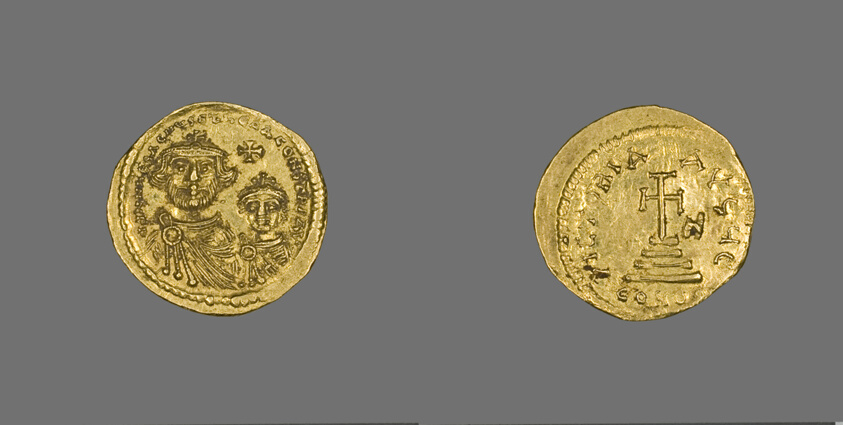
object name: Coin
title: Solidus (Coin) Portraying Heraclius and His Son Heraclius Constantine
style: byzantine, european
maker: Byzantine; minted in Constantinople (now Istanbul)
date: 613-616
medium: Gold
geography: Byzantine Empire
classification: coin; ancient art